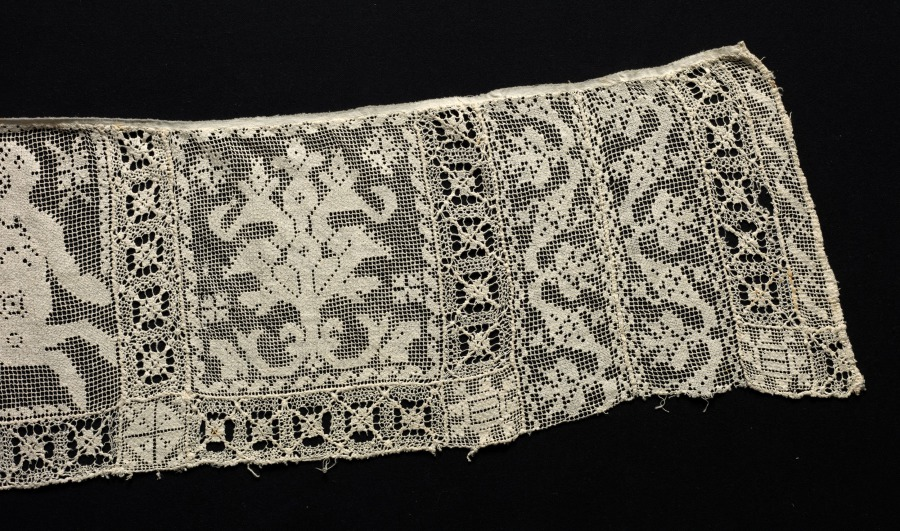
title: Band with Various Fantastic Creatures and Vegetal Patterns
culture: Italy, 1800s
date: 1800s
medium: Bleached linen (est.): needle lace, filet/lacis (knotted ground and darned in two directions)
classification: Lace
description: The reversed and backward orientation of many of the squares in this band of lace suggests that this was not their original layout. They were most likely taken apart and later joined back together in a disoriented manner.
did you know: The square showing a man in midair above a bull-like creature is reminiscent of the Minoan "Bull Leaping" fresco at the Knossos palace complex.